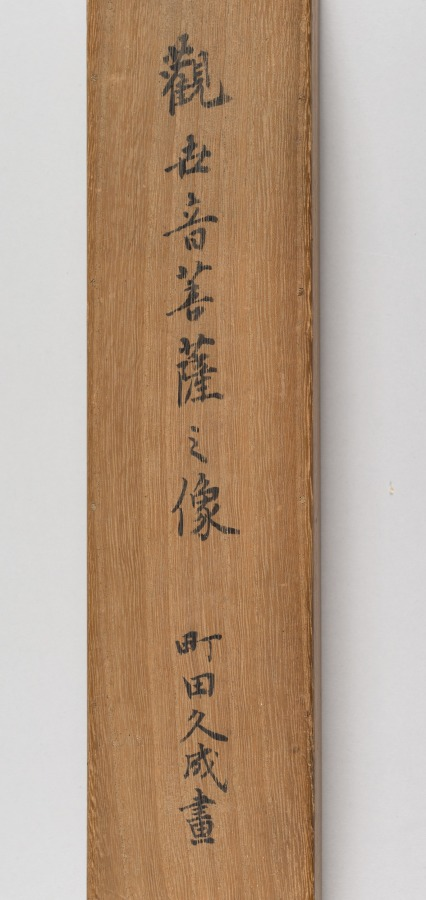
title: White-Robed Guanyin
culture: China, Yuan dynasty (1271-1368)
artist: copy after Jueji Yongzhong (Chinese, active around 1300)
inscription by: Zhongfeng Mingben (Chinese, 1263–1323)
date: late 1200s–early 1300s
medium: hanging scroll; ink and gold on silk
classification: Painting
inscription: Inscription: one of the 84,000 painted by the priest Insei.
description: The original model for this ink drawing of Guanyin, the bodhisattva of infinite compassion (Avalokiteshvara in Sanskrit), is CMA 1978.47.1. This drawing is a later copy with the same image of the White-Robed Guanyin, but in reverse. The inscription above reads: one of the 84,000 painted by the priest Insei. The inscription seems to indicate that the Japanese priest Insei repeatedly copied the image of the bodhisattva in an act of piety and to accumulate merit, as is promised in the Lotus Sutra for anyone who paints images of the Buddha, they “will achieve the Buddha path.” The priest’s name and seal need further study and identification.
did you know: The bodhisattva's face and halo were delicately painted in gold.